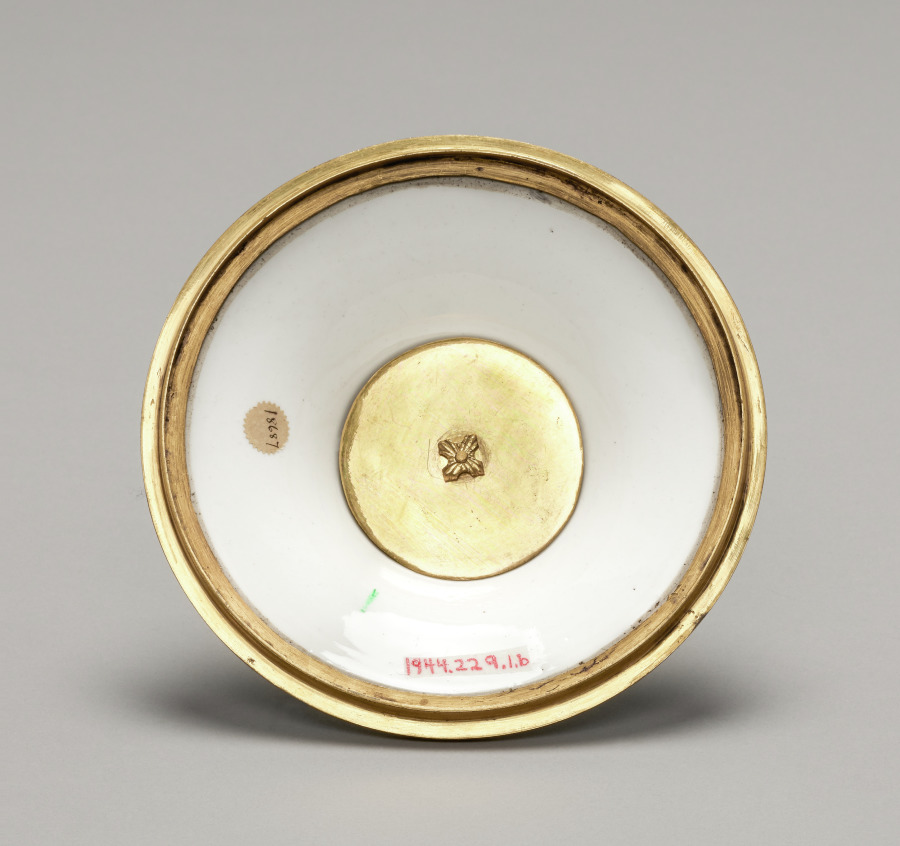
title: Cover for a Vase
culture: Germany, Meissen, 18th century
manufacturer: Meissen Porcelain Factory (German, est. c. 1710)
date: 1749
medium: porcelain mounted in gilt bronze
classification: Ceramic